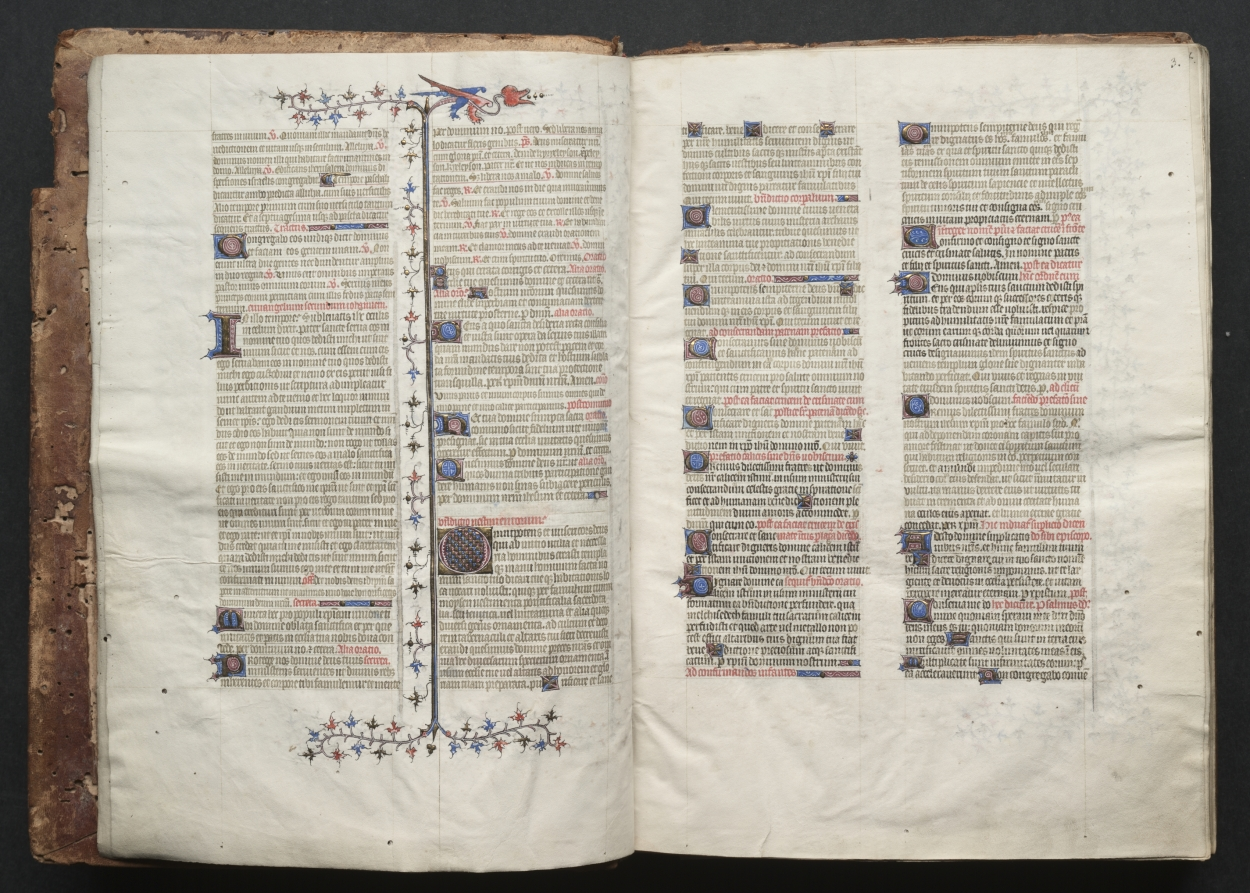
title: The Gotha Missal: Fol. 2v, Text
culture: France, Paris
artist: Master of the Boqueteaux (French)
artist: and Workshop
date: c. 1375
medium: ink, tempera, and gold on vellum; blind-tooled leather binding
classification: Bound Volume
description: The style and quality of this manuscript's decoration is typical of deluxe Parisian books made for aristocratic or royal patrons. Most of the book's decoration appears to be the work of the Master of the Boqueteaux, an artist active at the court of King Charles V (died 1380). His style was apparently shared by a number of book illuminators working in and around Paris. It is very possible that the Gotha Missal belonged to Charles V, but is not provable because the manuscript has no royal portraits and lacks a colophon. Given the book's magnificent decoration, however, it would seem that it was produced for a Valois prince, if not for the king himself. The manuscript receives its name from the German dukes of Gotha, its later owners.